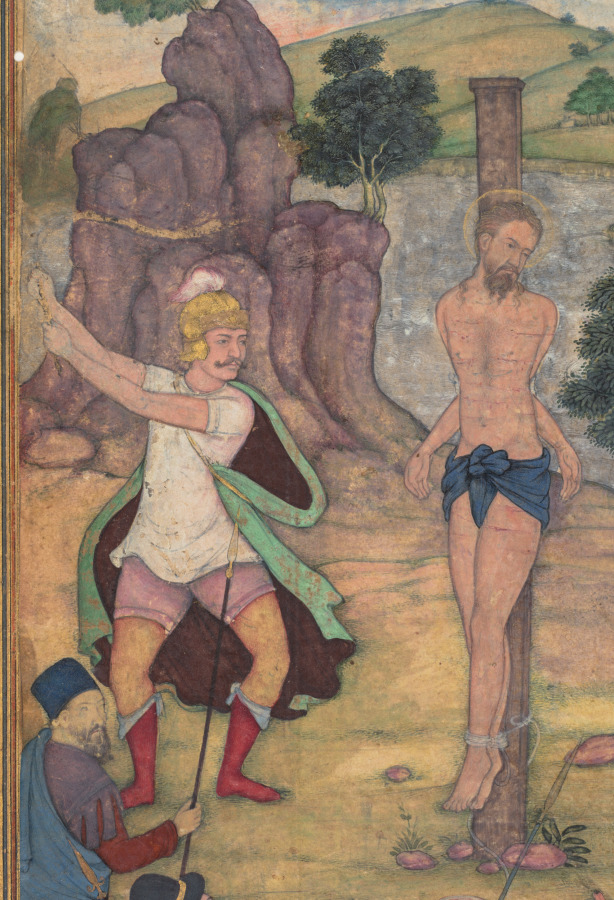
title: The Flagellation (folio 182 recto), from a Mirror of Holiness (Mir’at al-quds) of Father Jerome Xavier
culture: Mughal India, Allahabad, made for Prince Salim (1569–1627)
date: 1602–4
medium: Gum tempera, ink, color, and gold on paper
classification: Manuscript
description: Two Romans flog Jesus, who has been bound to a stake at the center of the circular composition made up of soldiers and the hilly horizon. His subtly articulated expression conveys both pain and compassion, as he endures cuts to his flesh and the bindings around his elbows that secure him so tightly to the post that his feet are elevated off the ground. This is the last illustration in the Cleveland manuscript of the Mirror of Holiness. The Crucifixion was never illustrated, possibly because the patron, Prince Salim, was Muslim. According to the Koran, Jesus did not die on the cross, but was absorbed into heaven by Allah.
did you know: A halo encircles Jesus’s head, and his hair and beard are highlighted with gold.